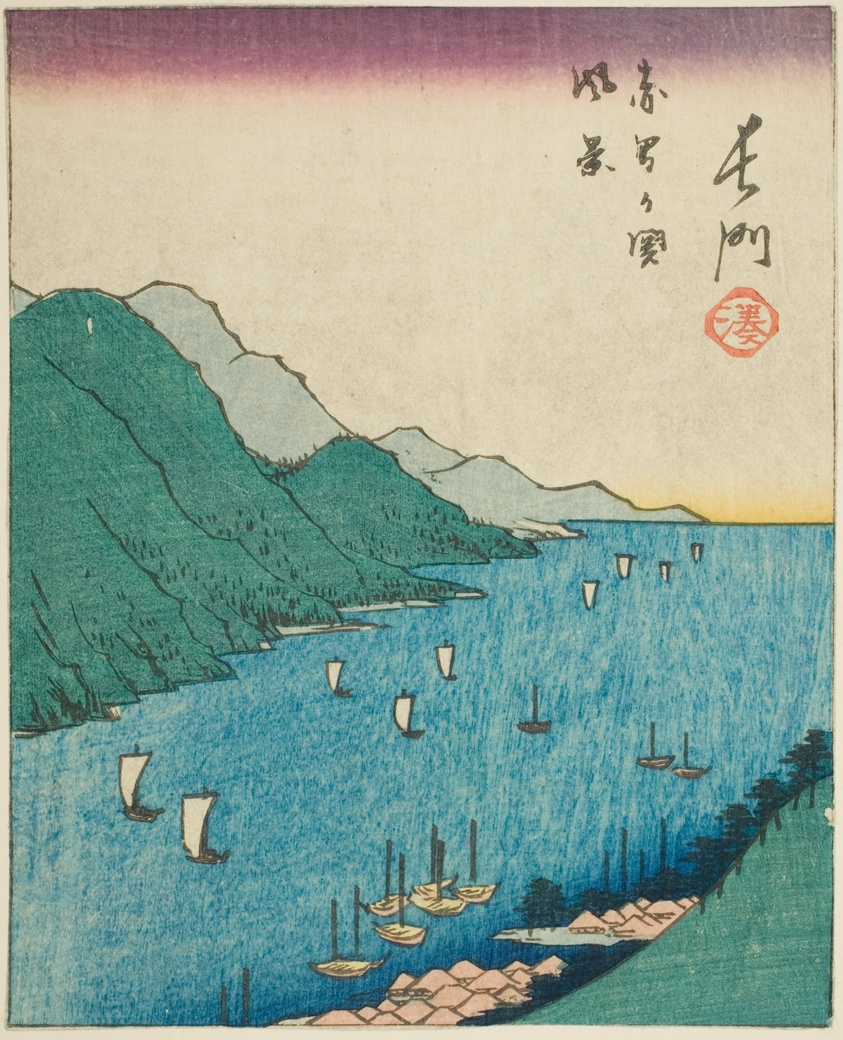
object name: Print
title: Nagato, section of sheet no. 15 from the series "Cutout Pictures of the Provinces (Kunizukushi harimaze zue)"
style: Japanese (culture or style)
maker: Utagawa Hiroshige 歌川 広重; Japanese, 1797-1858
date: 1852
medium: Color woodblock print; section of harimaze sheet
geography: Japan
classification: woodblock print; print; asian art